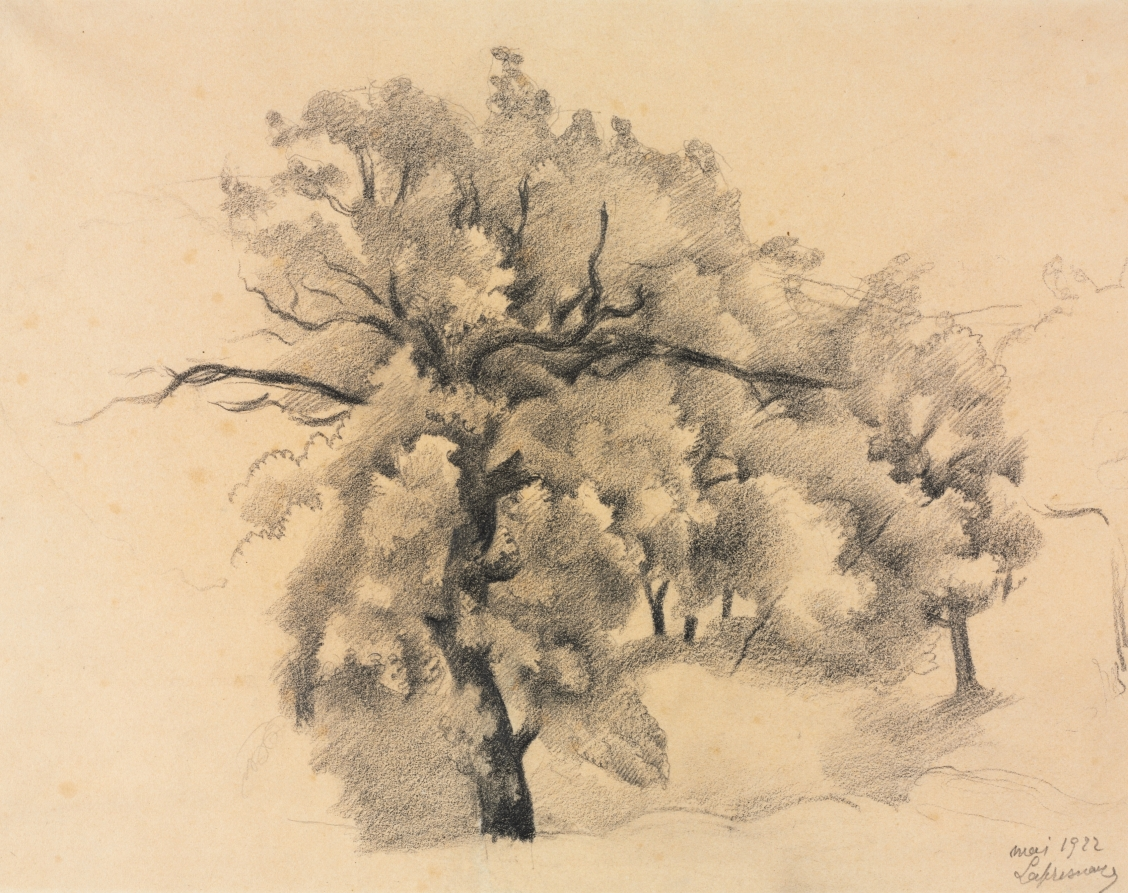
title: Study of Trees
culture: France, 20th century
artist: Roger de La Fresnaye (French, 1885–1925)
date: 1922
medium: graphite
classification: Drawing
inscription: signed, lower right, in graphite: mai 1922 / Lafresnaye